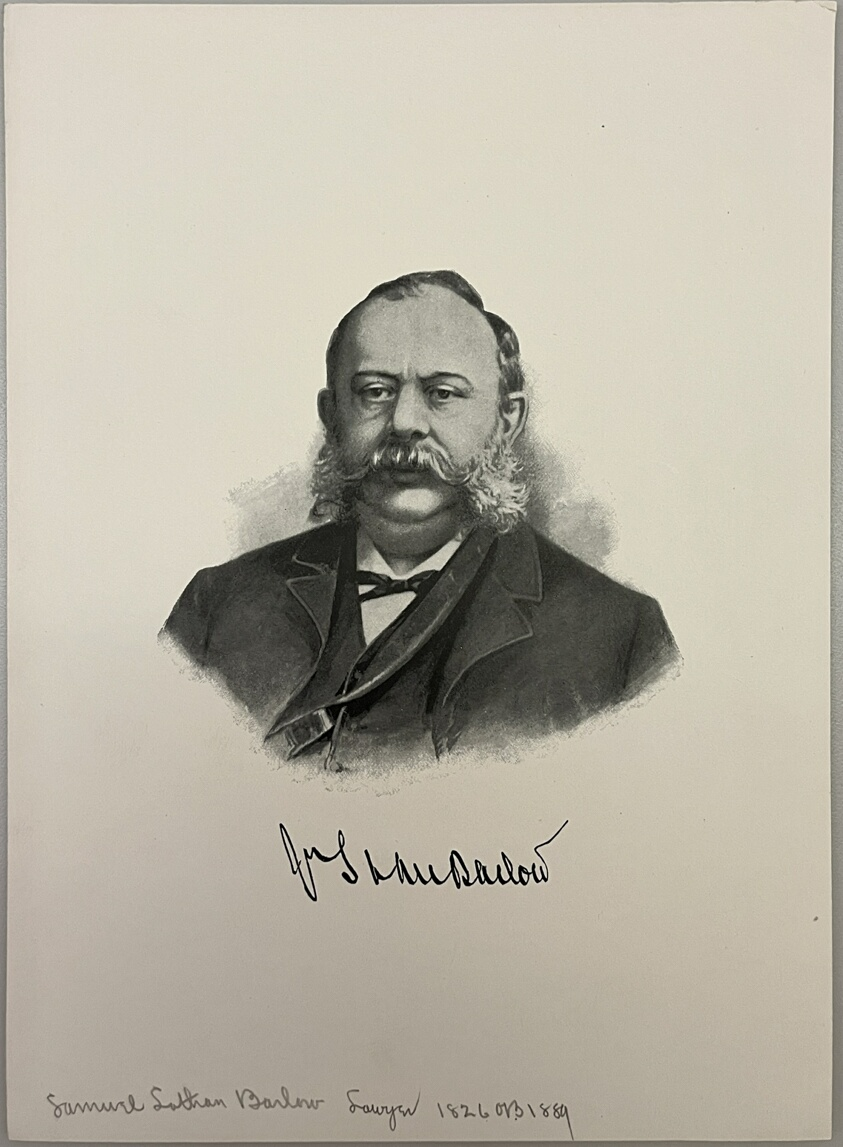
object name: Print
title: Samuel Latham Barlow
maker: Artist Unknown (Likely American or British, 19th century)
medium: Photolithograph on paper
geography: United States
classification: reproduction; print; prints and drawing